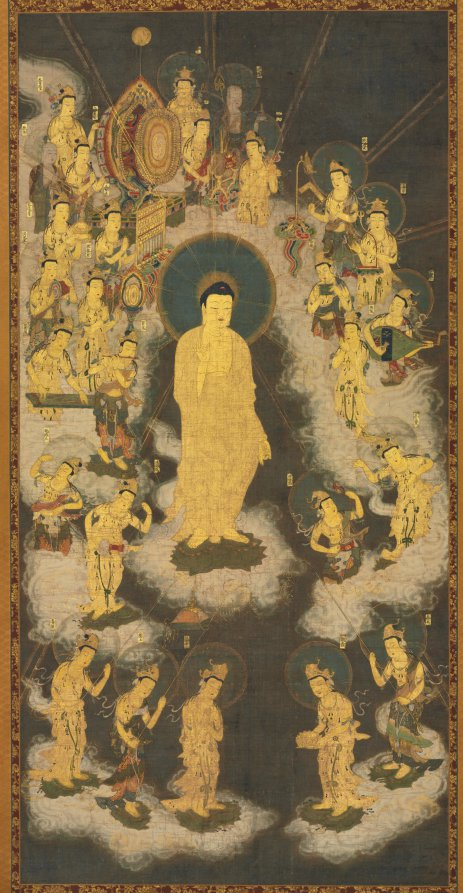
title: Welcoming Descent of Amida (Amida Raigō)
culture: Japan, Kamakura period (1185–1333)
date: 1300–1333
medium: hanging scroll; ink, color and gold on silk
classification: Painting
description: In the Pure Land school of Buddhism, Amida Buddha is the focus of worship. Pictured here is the raigō, or the moment when Amida descends with his retinue to welcome a dying person into his Pure Land, called the Western Paradise. Once there, a person can concentrate on becoming enlightened. Images like this one could be placed before a person on their deathbed to help them stay faithful and motivated to attain birth in the Pure Land.